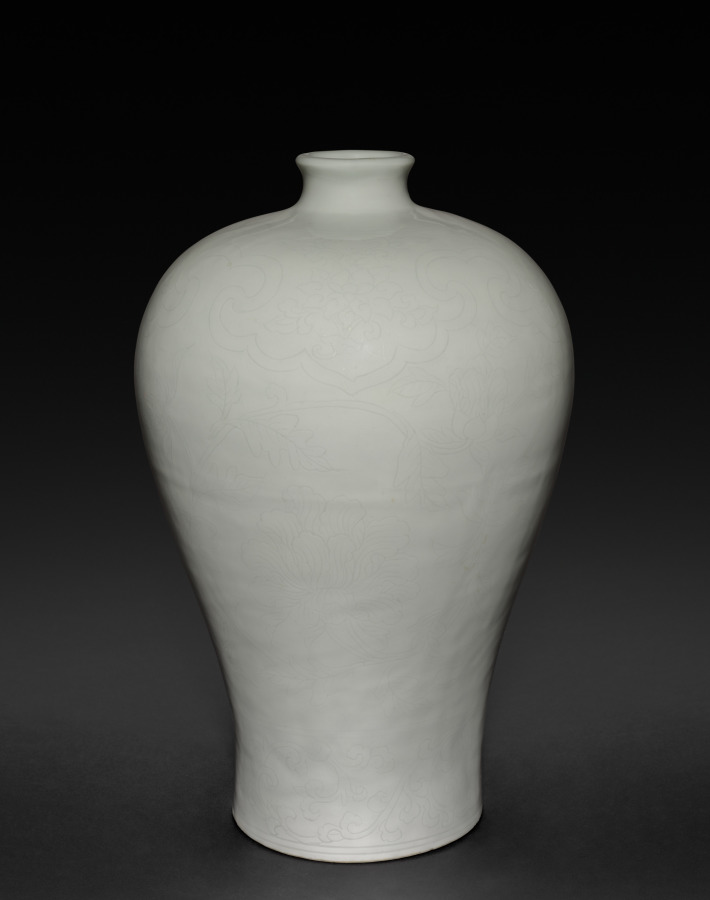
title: Meiping Vase with Cloud Collars and Peony Sprays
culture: China, Jiangxi province, Jingdezhen kilns, Ming dynasty (1368-1644), Yongle period (1403-1424)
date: 1403–24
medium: porcelain with incised decoration and white glaze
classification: Ceramic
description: This beautiful vase, called a meiping, is a testimony to the extremely high standards demanded for imperial white porcelain of the Yongle period. It is exquisitely potted and subtly decorated with "hidden decoration" (anhua) incised into the body. The clear glaze over the white body has a luster and purity; the white color radiates with a soft glow like melting snow, described by the Chinese connoisseurs as tianbai, or "sweetwhite." Tianbai wares were produced for use in imperial offerings and have always been considered a great achievement of the Yongle period.